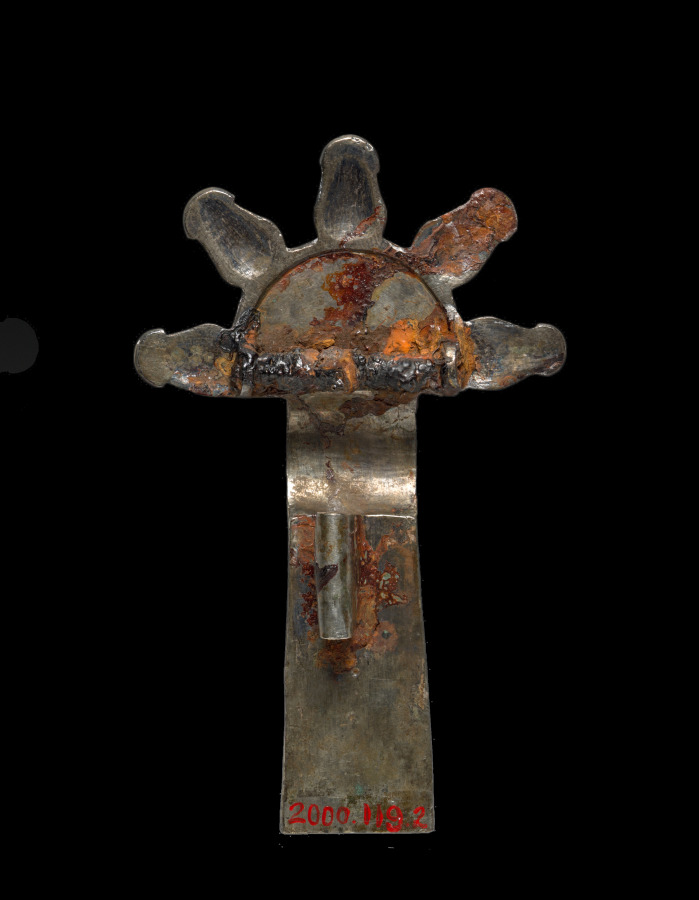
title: Fibulae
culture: Alemannic, Migration Period, 6th-7th century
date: 500s-600s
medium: cast silver, parcel-gilt, with niello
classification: Jewelry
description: A woman of high rank might have worn these twin fibulae on her shoulders, one fastening her inner garment on the right, the other her outer garment on the left. She might also have suspended them from her belt as decorative ornaments